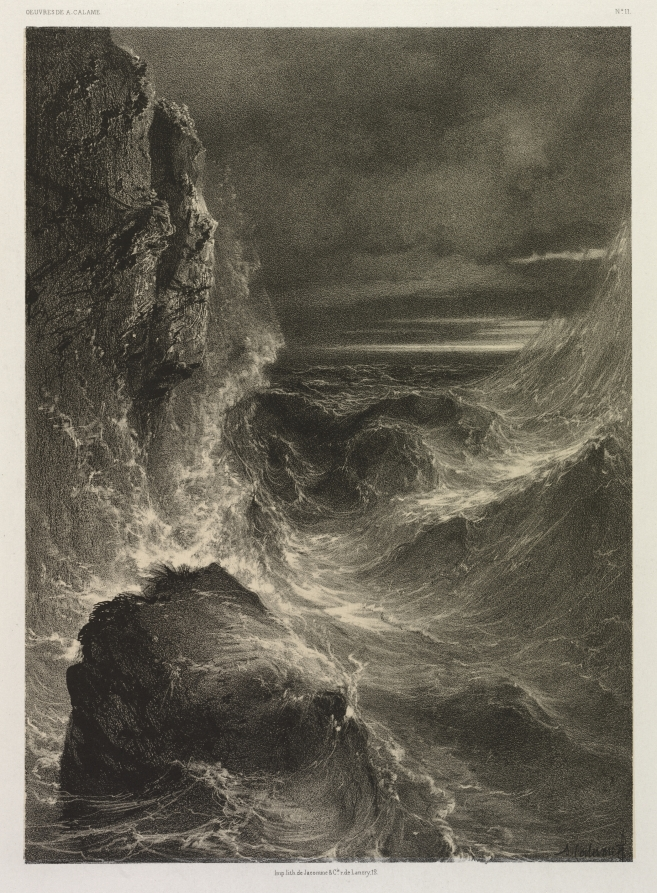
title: La Mer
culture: Switzerland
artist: Alexandre Calame (Swiss, 1810–1864)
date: 1851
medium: lithograph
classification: Print